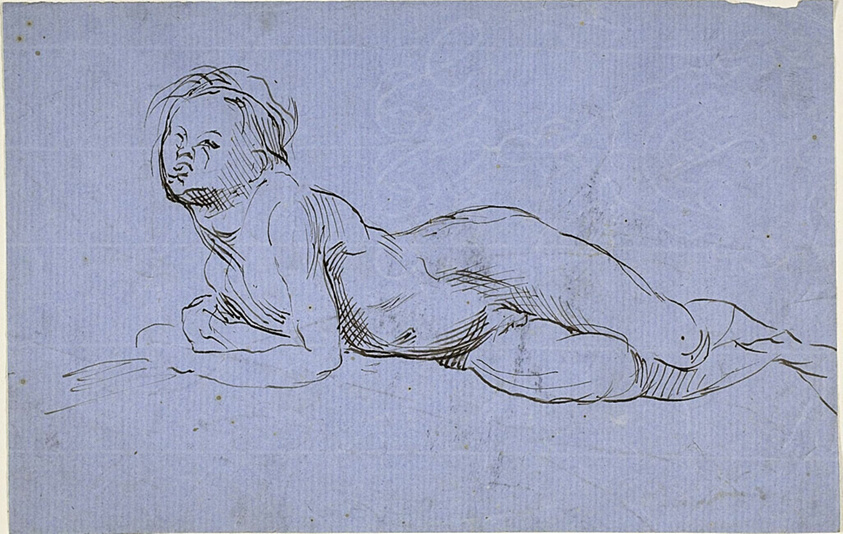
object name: Drawing and Watercolor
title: Young Boy Reclining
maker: Jean Baptiste Carpeaux (French, 1827-1875)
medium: Pen and brown ink on blue laid paper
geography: France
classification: pen and ink drawings; drawings (visual works); prints and drawing